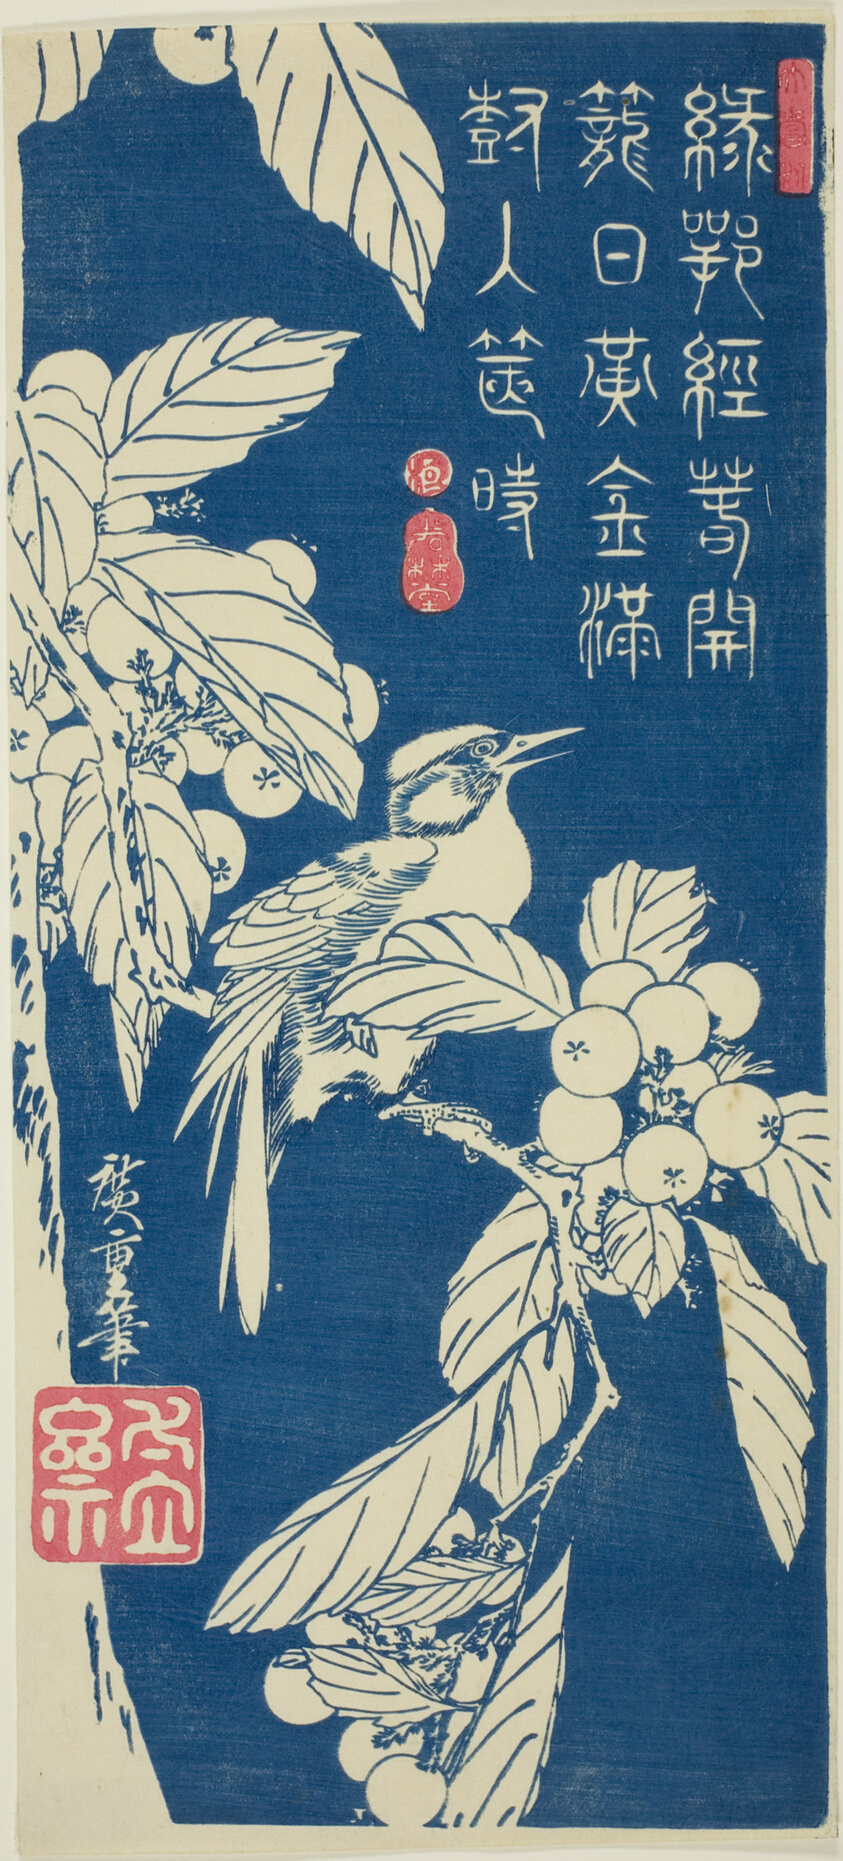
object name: Print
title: Loquat and bird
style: Japanese (culture or style)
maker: Utagawa Hiroshige 歌川 広重; Japanese, 1797-1858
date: c. 1830/44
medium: Color woodblock print; otanzaku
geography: Japan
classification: woodblock print; print; asian art